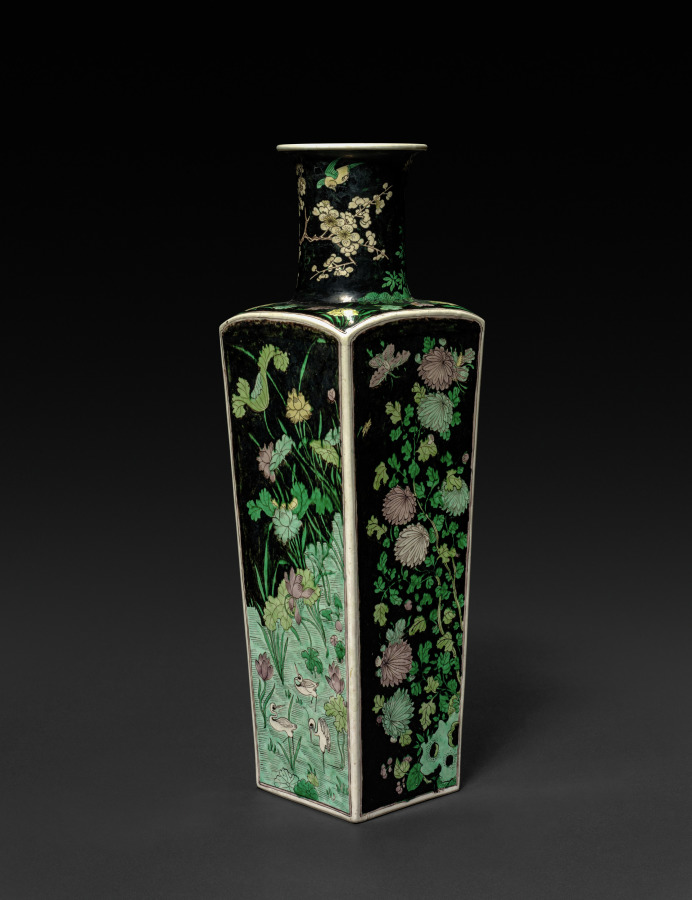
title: Club-shaped Vase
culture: China, Qing dynasty (1644-1911), Kangxi reign (1662-1722)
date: 1662–1722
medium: porcelain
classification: Ceramic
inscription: 碧玉堂製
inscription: [arrow] / Stand #115